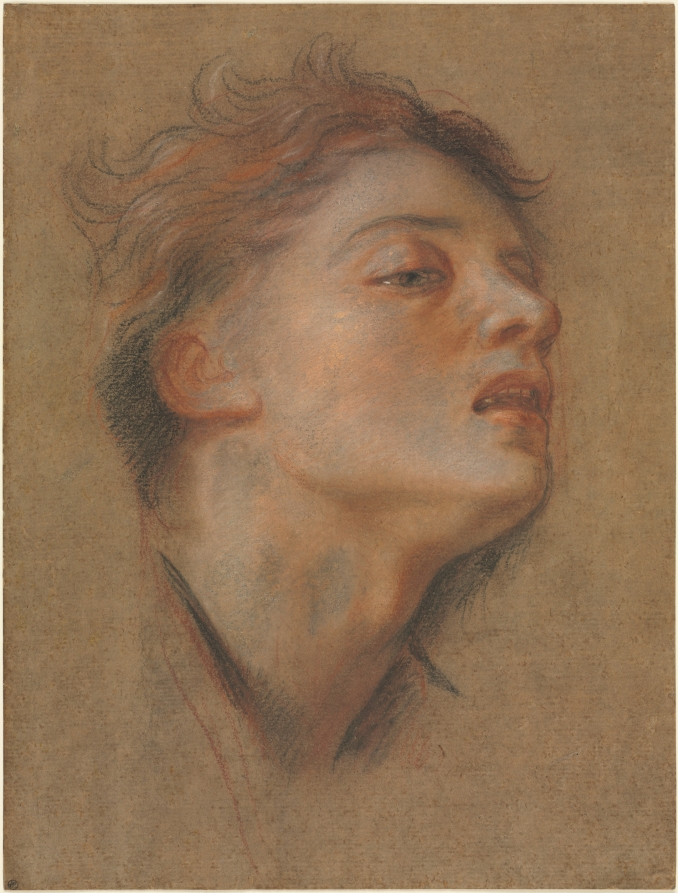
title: Head of a Young Man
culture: France, 18th century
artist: Antoine Coypel (French, 1661–1722)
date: 1715–1717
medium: red, black, and white chalk with stumping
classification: Drawing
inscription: Mount inscribed "Barocci" in graphite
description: The most important French painter of his generation, Antoine Coypel worked during the period of transition from the monarchy of Louis XIV (reigned 1643-1715) through the Regency (1715-1723) and the ascendance of Louis XV (reigned 1715-1774). A beautiful colorist also steeped in the academic tradition of drawing, Coypel used red, black, and white chalk together on this sheet to achieve tonal range. The drawing is connected to Coypel's greatest achievement: the series of large painted decorations for the Gallery of Aeneas in the Palais Royal in Paris. This study of facial expression shows one of the mourners attending the funeral of Pallas, a scene from Virgil's (70-19 bc) Aeneid. Though this painting still exists in the collection of the Louvre Museum, it is in a ruined state. Most of the paintings for the Gallery of Aeneas did not survive at all, but there are numerous drawings for the project.